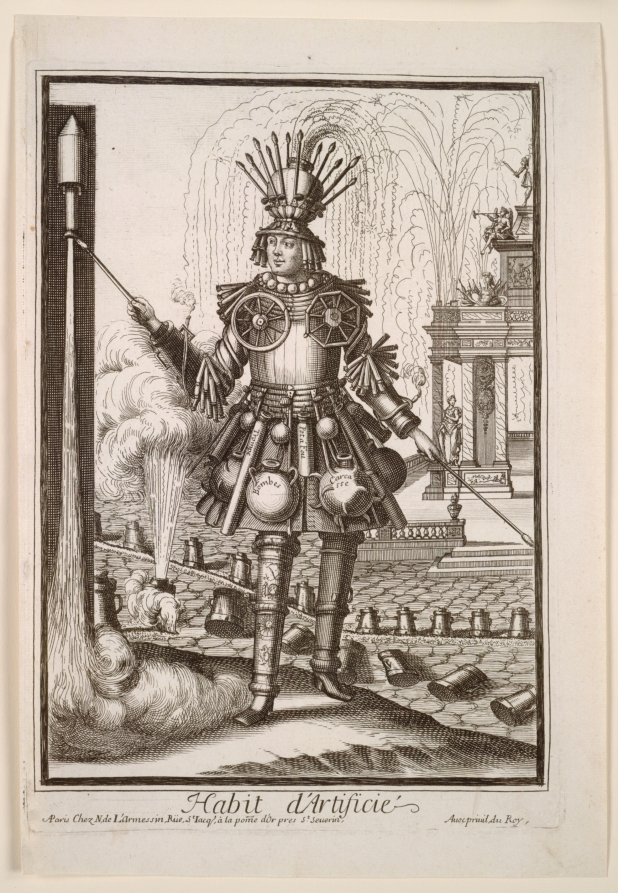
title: Fanciful Costumes: Costume of the Fireworks Maker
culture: France, 17th century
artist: Nicolas de Larmessin II (French, 1638–1694)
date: c. 1690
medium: etching and engraving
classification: Print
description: These two prints are from a series of about 70 fanciful portrayals of various trades and skills. The astrologer is decorated with the twelve astrological signs arranged in order, while the helmet of the fireworks maker appears to spray its own tuft of pyrotechnics into the sky. The astrologer also stands before a building labeled as an observatory, a telescope on its roof, and the costume of the fireworks maker resembles protective armor.